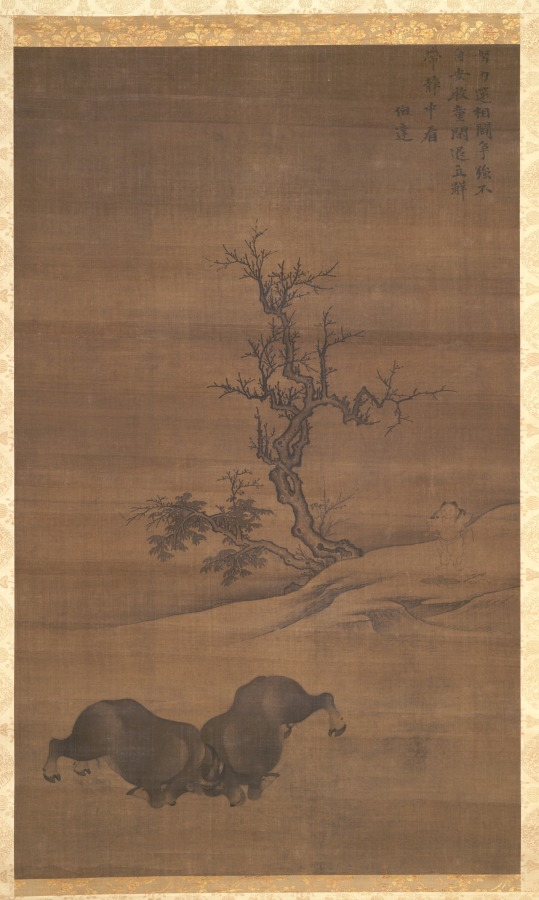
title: Herdboys and Buffalo in Landscapes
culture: China, Qixian, Yuan dynasty (1271-1368)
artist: Guo Min (Chinese, mid-late 1200s)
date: 1200s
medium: Pair of hanging scrolls; ink on silk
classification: Painting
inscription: 努力還相鬪，爭強不自安。/ 牧童閑退立，解帶靜中看。/ 伯達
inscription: 齊向中流渡，那知行路難。/ 前村青草長，煙雨□漫漫。/ 伯達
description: Herdboys tend their buffalo in a bucolic landscape by a winding stream. Guo Min emphasizes the massive forms and mighty power of the animals, transforming them into forces of nature. The poem in the first scroll reads: "The bulls are engaging in fighting, Cautiously, each seeks to overcome the other. The herdboy calmly stands by. Untying his belt, he silently watches." The poem in the second scroll reads: "Together, they wade through the middle of the stream, Mindless of perils in the journey. The grass grows tall in the village ahead, While the mist and rain spread far and wide."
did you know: Tending water buffalos has traditionally been the task of young boys and can still be seen in rural areas of Southern China today.